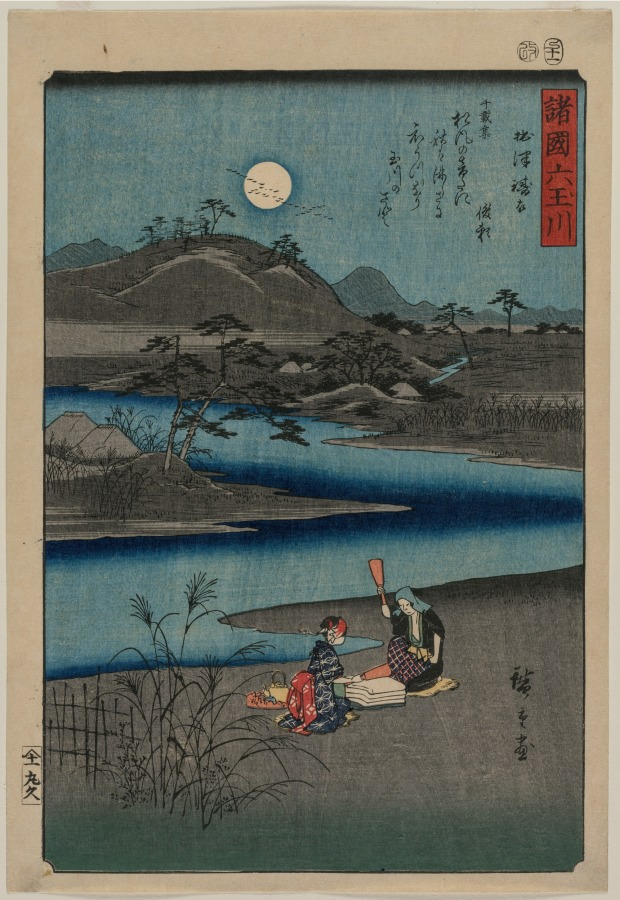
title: Cloth Fulling Jewel River in Settsu, from the series Six Jewel Rivers of the Various Provinces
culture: Japan, Edo period (1615–1868)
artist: Utagawa Hiroshige (Japanese, 1797–1858)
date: 1857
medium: Color woodblock print, ink and color on paper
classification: Print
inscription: Signature: Hiroshige ga. Publisher: Maruya Kyushiro (Marukyu, emblem). Censorship Seal: aratame.